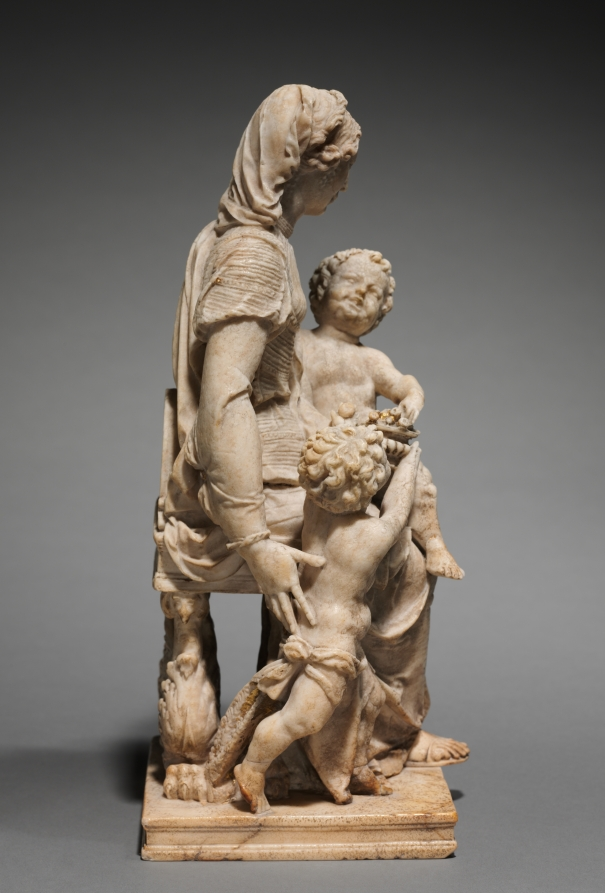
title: Charity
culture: Franco-Flemish, second half 16th century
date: c. 1550–1600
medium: alabaster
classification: Sculpture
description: When this alabaster group entered the museum's collection, it was thought to depict the Virgin Mary, Christ, and Saint John the Baptist. It has been identified, however, as a personification of Charity, the most elevated of the three Christian theological virtues. The two other theological virtues are Faith and Hope. Within Christian belief, Charity is also known as a supernatural virtue, where the object of human conduct is the ultimate unification with God through love. Alluding to its eminent position, Charity sits enthroned, with powerful hybrid beasts supporting her chair. The diminutive footstool propping up her left foot may refer to the necessity of humility in one's relationship to God. Also, a child raises a vessel filled with fruits to another suggesting that selflessness and love are attributes of charitable actions.